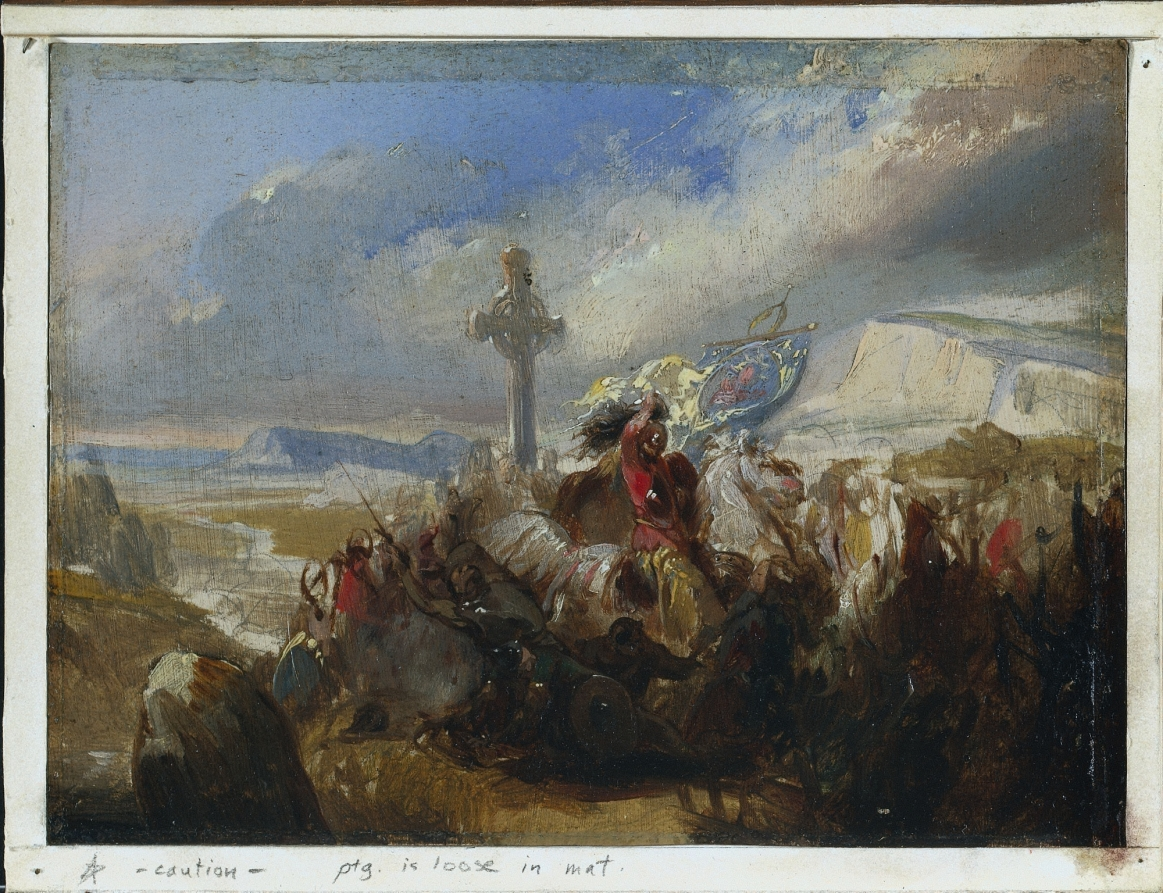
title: Battle of Poitiers, 25 October 732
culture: France, 19th century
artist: circle of Baron Charles de Steuben (French)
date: 1830s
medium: oil on pulp board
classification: Painting